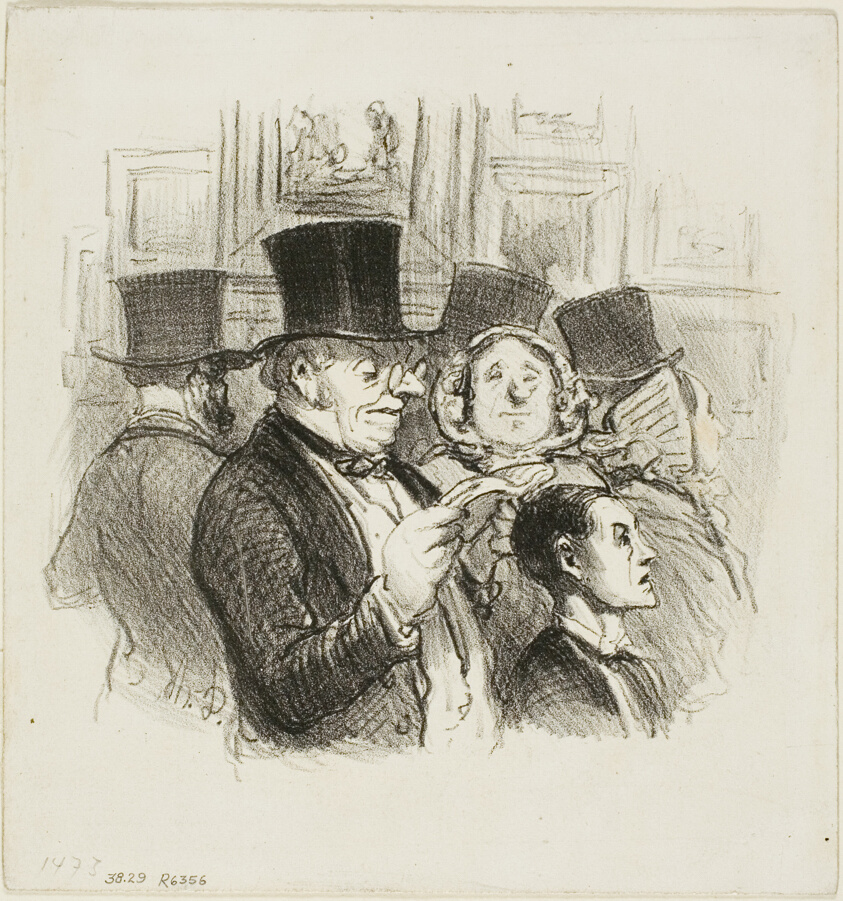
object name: Print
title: A Visit to the Salon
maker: Honoré Victorin Daumier; French, 1808-1879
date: 1845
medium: Lithograph in black on white wove paper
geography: France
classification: lithograph; print; prints and drawing